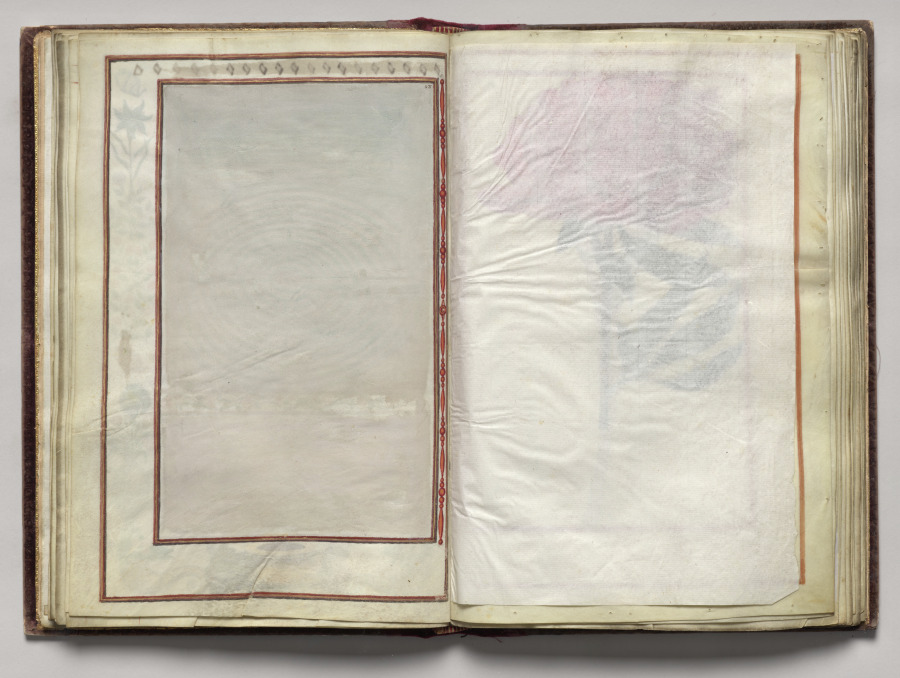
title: Border, folio 16 (verso), from Florilegium (A Book of Flower Studies)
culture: France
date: 1608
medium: watercolor, ink, silver and gold over occasional traces of pencil, on vellum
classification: Bound Volume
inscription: Dated: Poitiers 1608 (on frontispiece) Signed: On frontispiece in black ink, lower right: Van Kuyk Notation on drawing: Frontispiece: in pencil, lower margin: * élève de Van Kessel, peintre flammand (* in pencil also appears in front of Van Kuyk's name).